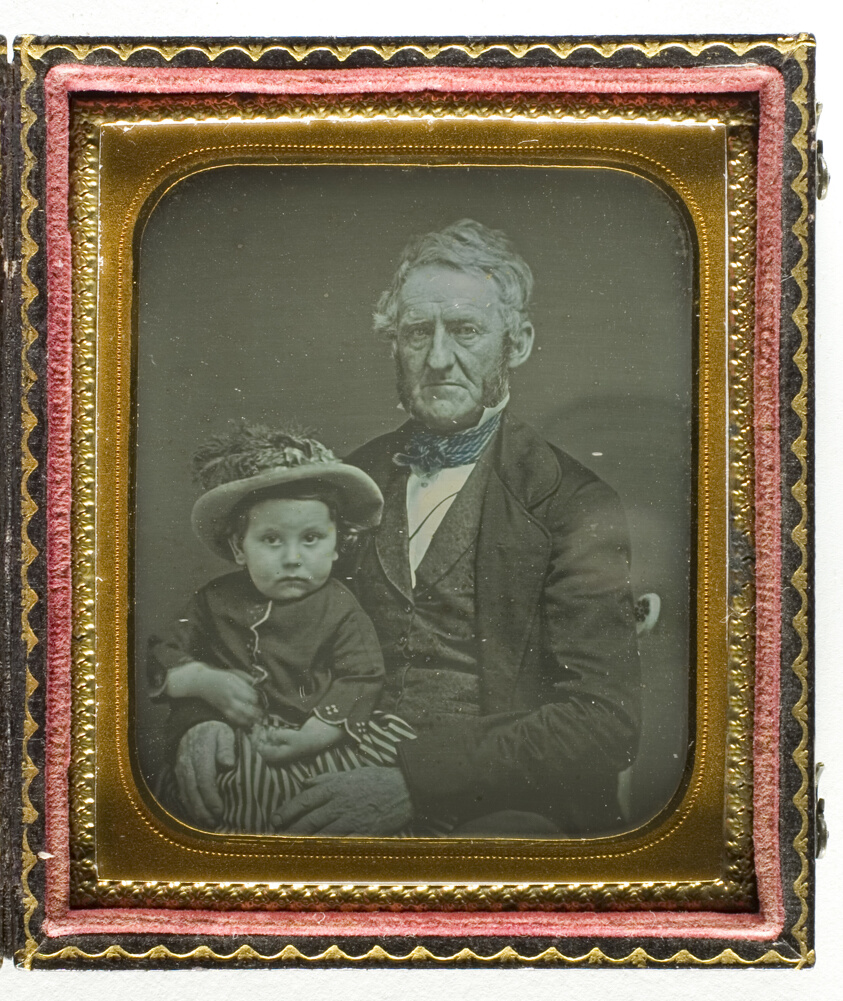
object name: Photograph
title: Untitled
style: 19th century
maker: Artist unknown; American, 19th century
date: c. 1850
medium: Daguerreotype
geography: United States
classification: daguerreotype; photographic process; photography; photograph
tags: Collected by Hugh Edwards